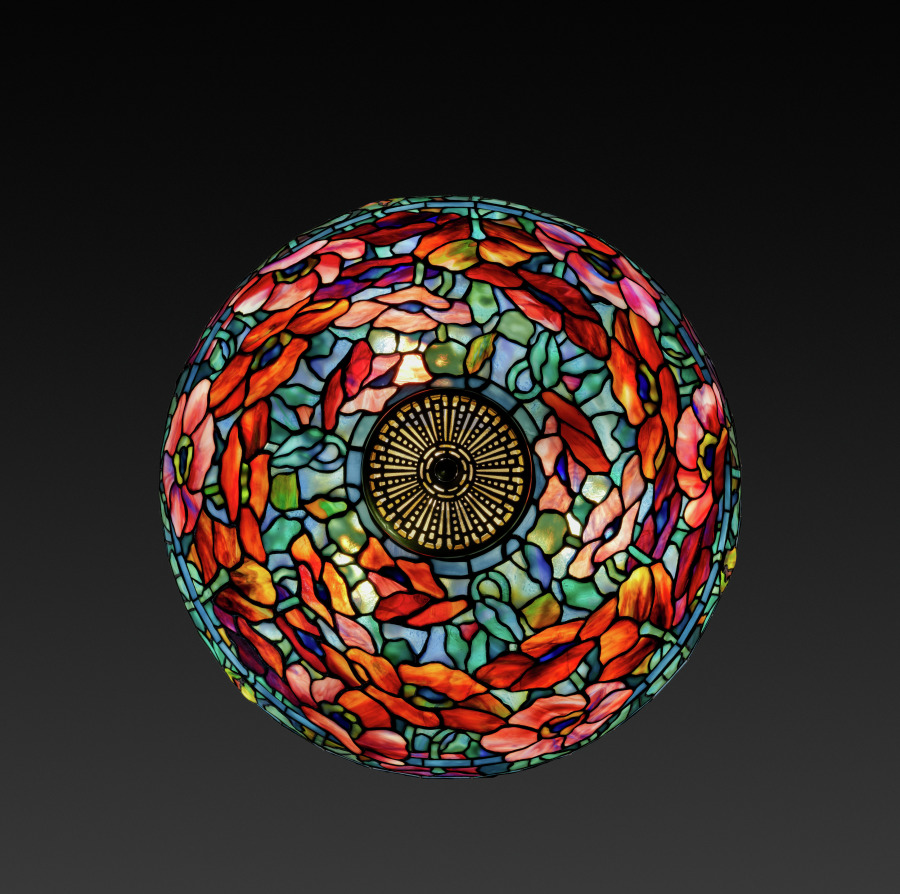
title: Oriental Poppy Table Lamp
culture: America, New York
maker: Tiffany Studios (United States, New York, 1902–32)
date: c. 1902–10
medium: Leaded glass, gilt bronze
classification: Lamp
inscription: TIFFANY STUDIOS NEW YORK 1583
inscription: TIFFANY STUDIOS/NEW YORK/669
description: In the 1870s a renewed emphasis on natural landscapes ushered in a generation of cottage gardeners who delighted in planting perennials in large quantities. Louis Comfort Tiffany was among those who championed the lush, sometimes wild-looking displays of varied floral species in the garden at his Long Island estate, Laurelton Hall. Tiffany encouraged his designers to take inspiration from his garden by shipping fresh cuttings almost weekly to his studios. Ohio native Clara Wolcott Driscoll and her team of female designers created floral patterns for lamps and mosaics based on the colorful blooms of spring that became among the most sought after and commercially successful of Tiffany’s production.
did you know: Louis Comfort Tiffany sold many shades in standardized sizes and shapes so that they could be interchangeable, such as this combination of a poppy shade on an iris base.